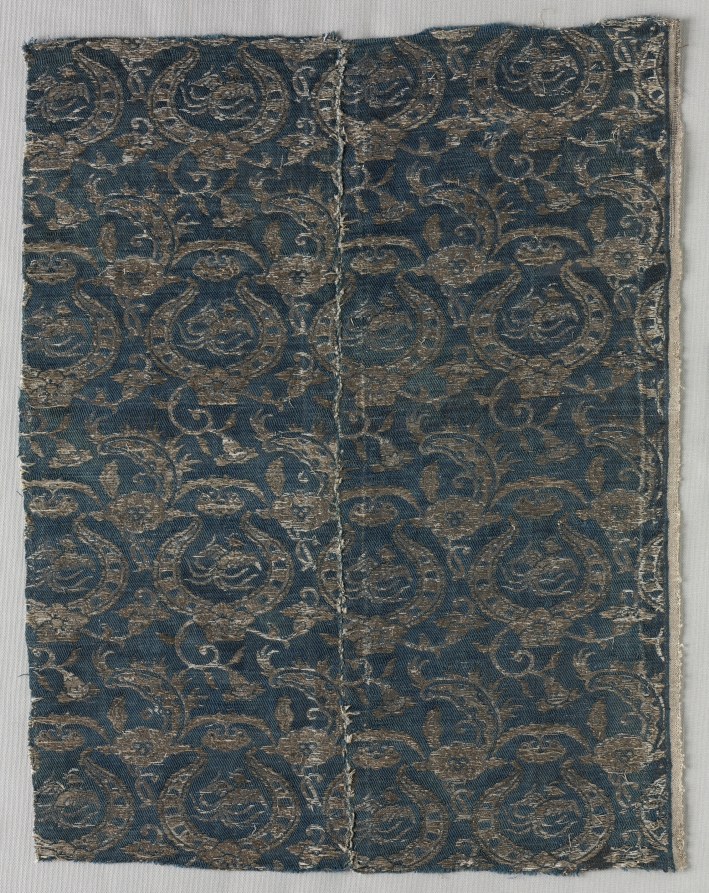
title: Textile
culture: China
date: 1800s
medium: lampas weave with small areas of compound tabby, silk and metallic thread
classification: Textile